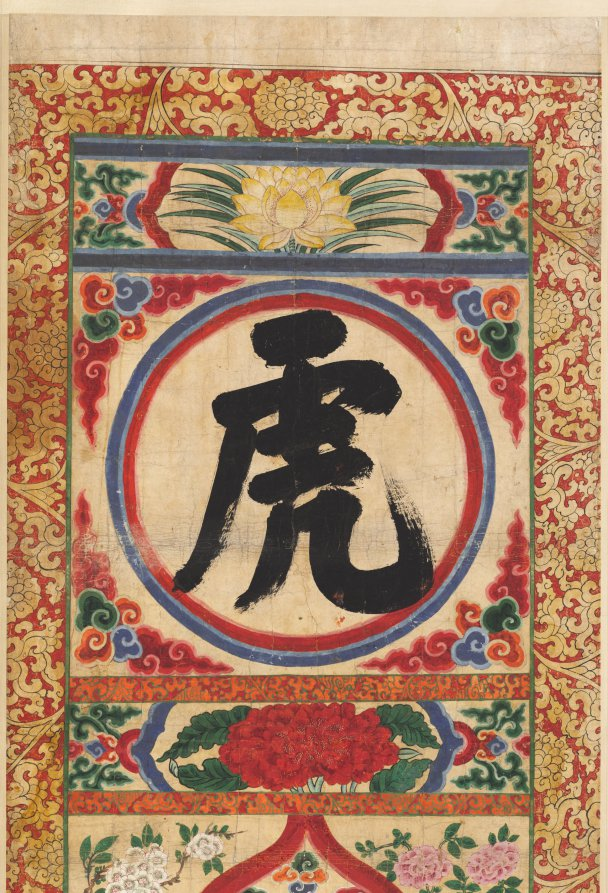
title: Painted Panel of Character "Tiger"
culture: Korea, Joseon dynasty (1392–1910)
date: early 1900s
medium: hanging scroll, ink and color on paper; unmounted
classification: Painting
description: This set of four colorful hanging scrolls may have been used in an outdoor Buddhist ritual to evoke heavenly blessings. Each hanging scroll bears four different character; tiger, dragon, whistle, and recite. Traditionally, tiger and dragon belong to the four directional guards, respectively west and east.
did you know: This set of four colorful hanging scrolls may have been used in an outdoor Buddhist ritual to evoke heavenly blessings.